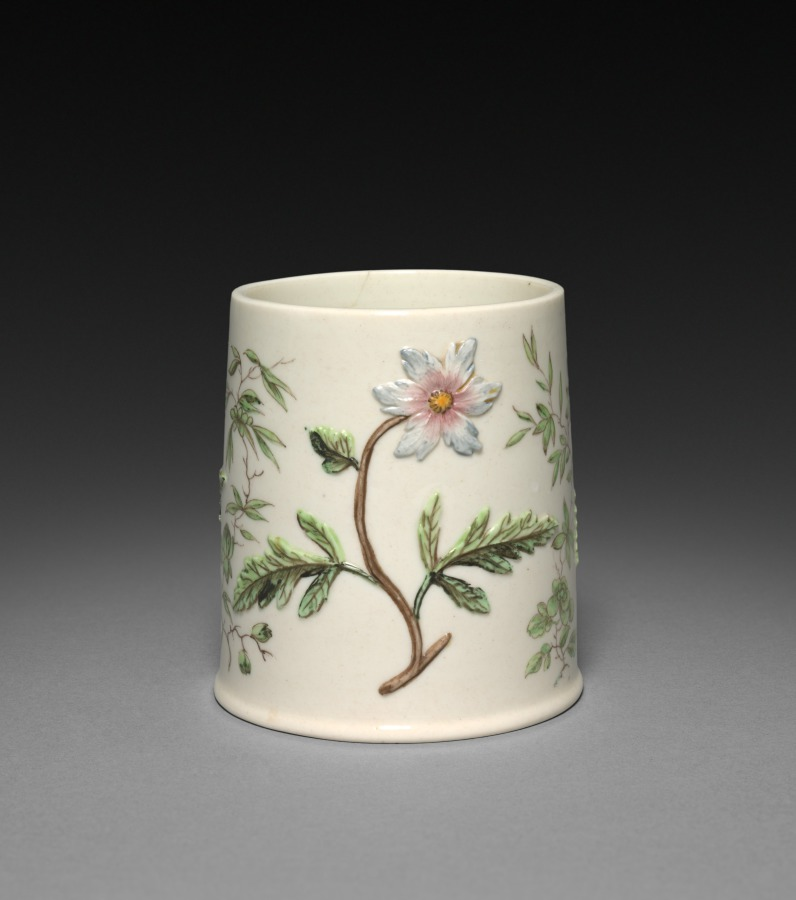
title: Beaker-Shaped Vessel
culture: Italy, Naples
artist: Capo di Monte Factory (Italian)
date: c. 1745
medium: porcelain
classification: Ceramic